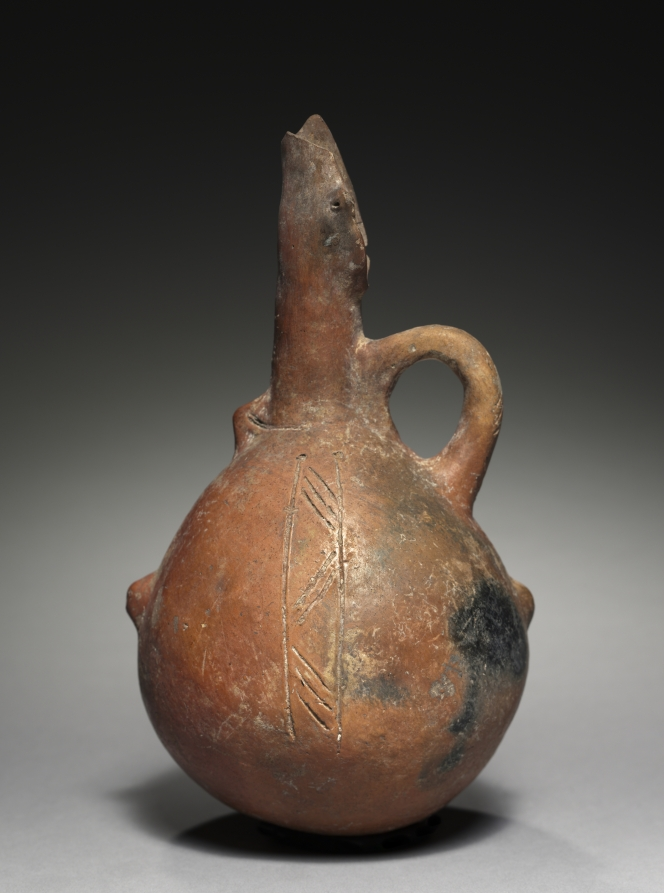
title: Jug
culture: Cyprus, early Cypriot III–middle Cypriot I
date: c. 2000–1800 BCE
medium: red ware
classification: Ceramic